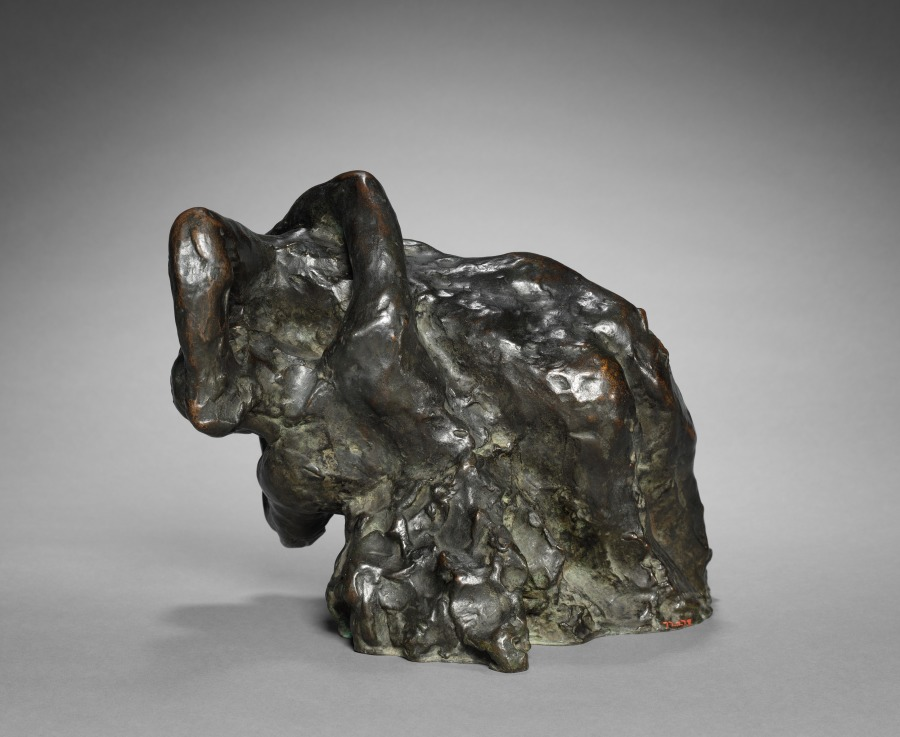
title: Les Damnées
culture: France, 19th century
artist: Auguste Rodin (French, 1840–1917)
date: 1885–1895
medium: bronze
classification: Sculpture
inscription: Signed front bottom right: "A. Rodin"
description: Rodin derived this couple, whose twisted bodies are locked painfully together, from the naked figures writhing in agony in his monumental sculpture The Gates of Hell.